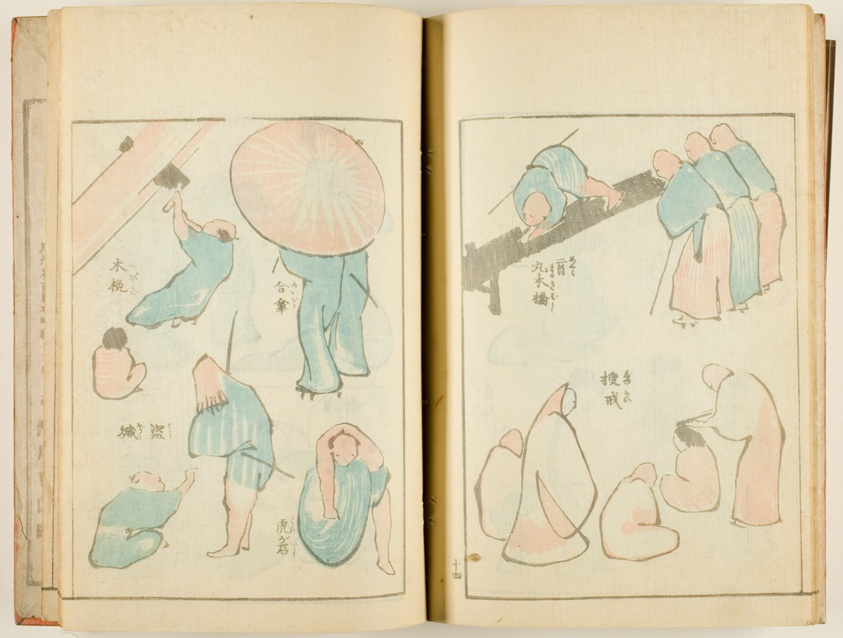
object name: Book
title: Ippitsu gafu (Album of Drawings with One Stroke), complete in 1 vol.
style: Japanese (culture or style)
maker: Katsushika Hokusai 葛飾 北斎; Japanese, 1760-1849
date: 1823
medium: Book; woodblock printed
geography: Japan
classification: book; woodblock print